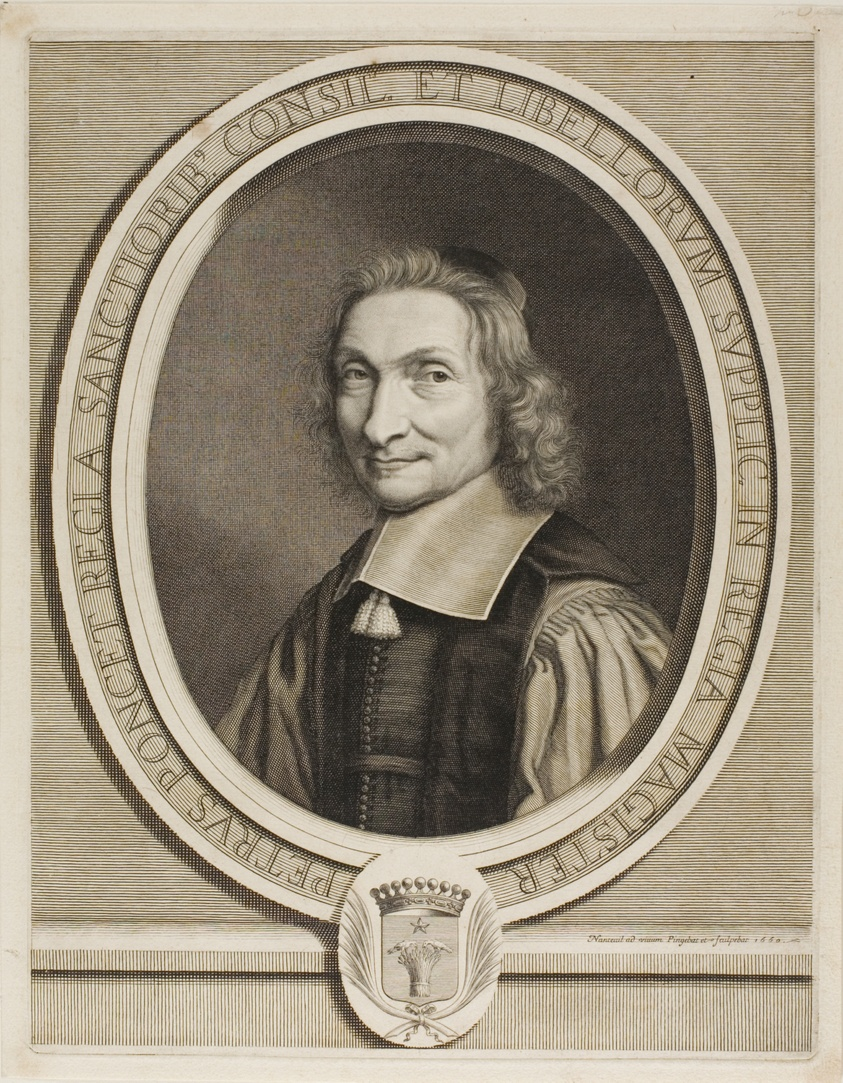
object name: Print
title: Pierre Poncet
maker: Robert Nanteuil (French, 1623-1678)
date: 1660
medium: Engraving on paper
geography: France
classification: engraving; print; prints and drawing